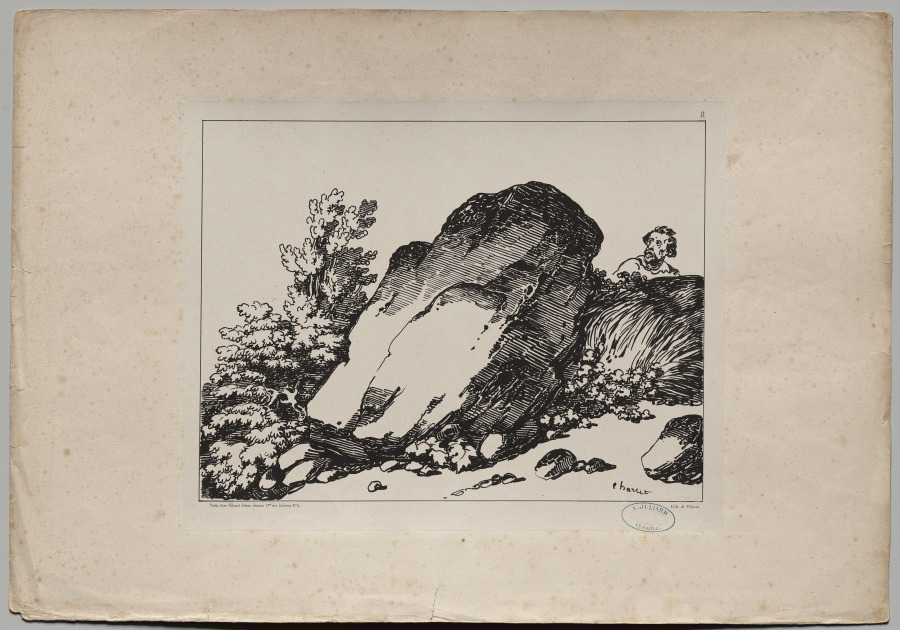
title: Landscape with Large Rock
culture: France, 19th century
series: Croquis à la Manière noire: Sujets philosophiques, populaires, moraux, politiques, critiques, civils, religieux, et militaires, dédiés à Béranger par Charlet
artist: Nicolas Toussaint Charlet (French, 1792–1845)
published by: Gihaut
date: 1840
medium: lithograph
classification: Print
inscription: Signed in stone: "Charlet"